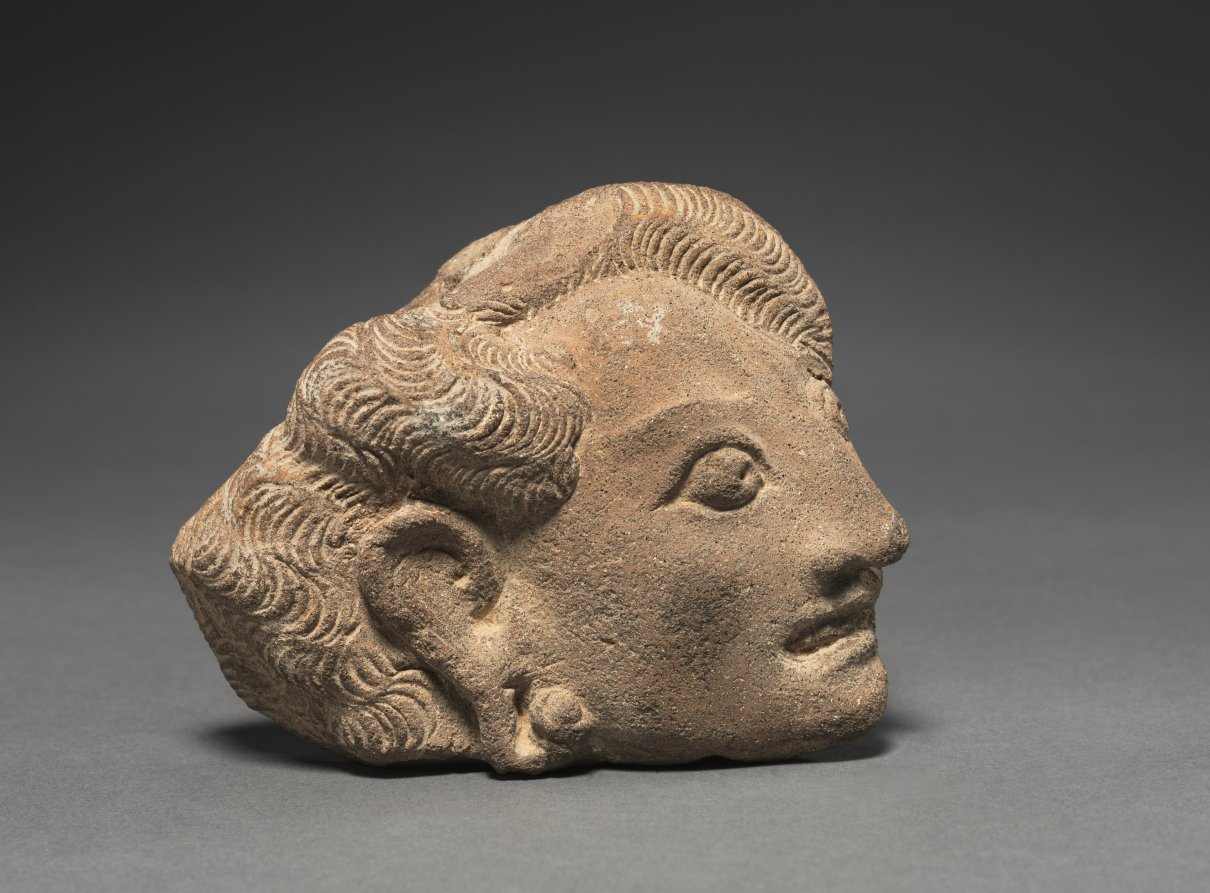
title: Yakshini's Head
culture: Java, Eastern Javanese Period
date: c. 11th Century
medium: terracotta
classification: Sculpture